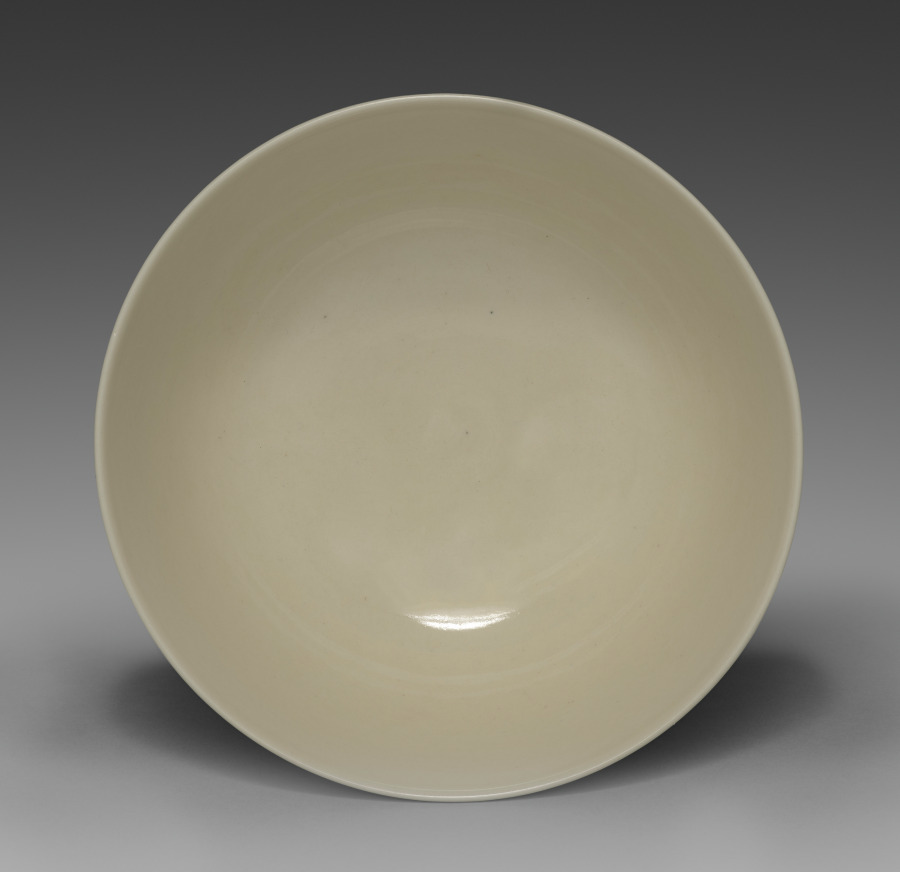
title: Sweets Bowl with Chrysanthemums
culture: Japan, Taishō period (1912–26) or Shōwa period (1926–89)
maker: Seifū Yohei IV (Japanese, 1872–1951)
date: 1914–46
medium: Porcelain with in-glaze and underglaze color and molded design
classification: Ceramic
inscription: 清風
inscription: 成山清風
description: Sweets bowls hold the confections enjoyed when drinking tea. This bowl and CMA 2022.207 offer an important lesson in appreciating Yohei IV’s ceramic practice, for while they have the same design and shape and are made with the same materials, the execution of the pieces makes them entirely different upon close inspection, thereby demonstrating the range of possible production results from a single template. Each bowl has the same composition of two different types of chrysanthemum flowers, one with long, slim, knifelike petals and the other with short, rounded, multilayered petals, shown running around its surface in low relief. The centers of the flowers are painted with yellow under the glaze. Yohei III formulated a number of new underglaze colors during his career, and this is likely one of them. The storage box lid provides abbreviated descriptions of the complex processes used in the surface decorations. It identifies the bowl inside as “Sweets dish with picture of chrysanthemum in kanpakuyū.” The box lid has on its exterior the seal reading “Seizan Seifu” 成山清風, which includes Yohei IV’s style name, but no signature. Instead, a signature is found on the interior of the box lid, accompanied by another seal, this time a gourd-shaped seal reading “Seifu.” The ink inscriptions are in a mode closer to formal script. This bowl, with the signature on the inside of the box lid, stands out for a distinctively bubble-filled glaze with a heavier pink effect, as well as more noticeable yellow at the flowers’ centers and deeper carving in the relief decoration. The design has crept much closer to the rim. A closer look at the delineation of the flower petals reveals that the designs differ at times with respect to which petals appear in front or behind others. The centers of the bases of both bowls are incised with “Seifu” in a manner matching many other works by Yohei IV, although there are slight differences. As one might expect from the other differences in the bowls, the characters on the base of the subtle bowl, CMA 2022.207, are gentler, finishing in a tapering out of the strokes. The strokes on this bold bowl end in triangular pinheads.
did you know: Here Yohei IV used his father’s kanpakuji formula, with underglaze pink for the gradated wash of color surrounding the flowers.